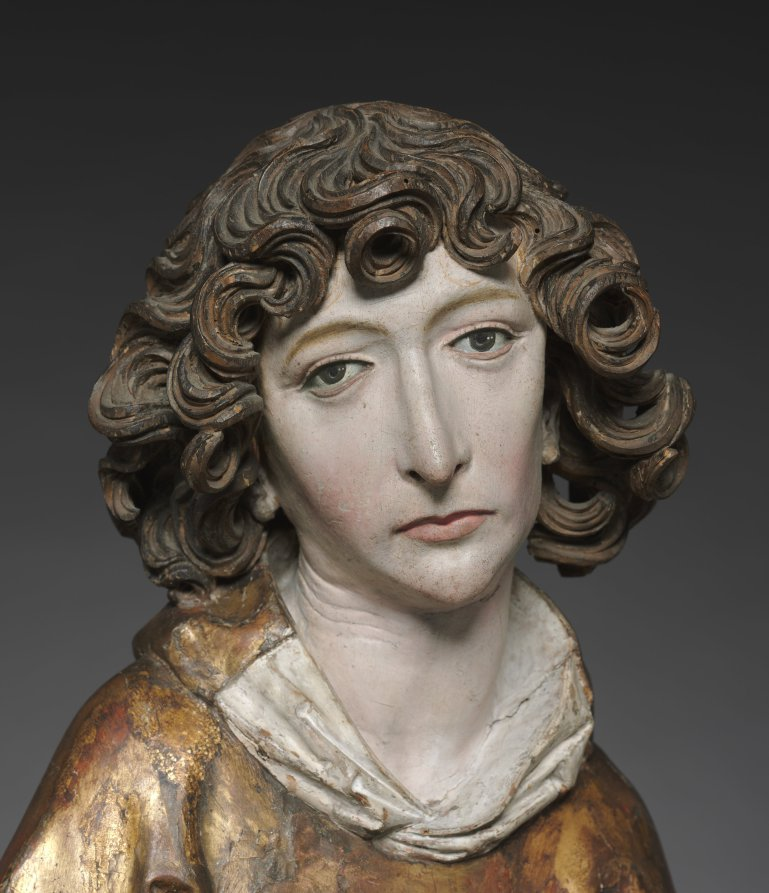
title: Saint Lawrence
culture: Germany, Würzburg, 16th century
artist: Tilman Riemenschneider (German, active Würzburg, c. 1460–1531)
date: 1502–8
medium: lindenwood with polychromy and gilding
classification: Sculpture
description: This sculpture, along with that of Saint Stephen (1959.43), and two female saints preserved in Frankfurt (Historisches Museum), are believed to be the remaining fragments of a large altarpiece carved by Riemenschneider for the Dominican convent in Rothenburg in Franconia (demolished in 1813). Saints Stephen and Lawrence both wear the dalmatic to indicate their status as deacons in the early church. Each holds a symbol of his martyrdom; here, Saint Lawrence holds a grill to indicate his death by burning. Late Gothic Style Art in Germany through the early 1500s remained firmly anchored in the late Gothic style with its associated interests in realism. Riemenschneider was one of the most prolific and versatile sculptors of this style, a recognized master in both stone and wood. His flourishing workshop employed as many as 40 apprentices in sculpting, woodcarving, and painting. His sculptures are noted for the dreamy, melancholy, and introspective quality in their expressions, as well as their remarkable attention to detail.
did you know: Before Riemenschneider finally settled in Würzburg, Germany, in 1484, he traveled to Strasbourg and Colmar, where he became acquainted with the works of the engraver Martin Schongauer.